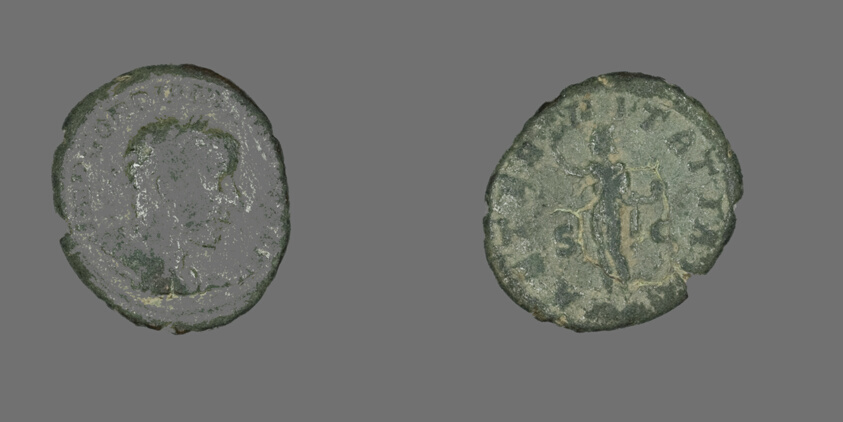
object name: Coin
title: As (Coin) Portraying Emperor Gordian III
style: roman (ancient, style or period)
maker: Roman, minted in Rome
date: 241-243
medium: Bronze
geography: Roman Empire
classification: coin; ancient art